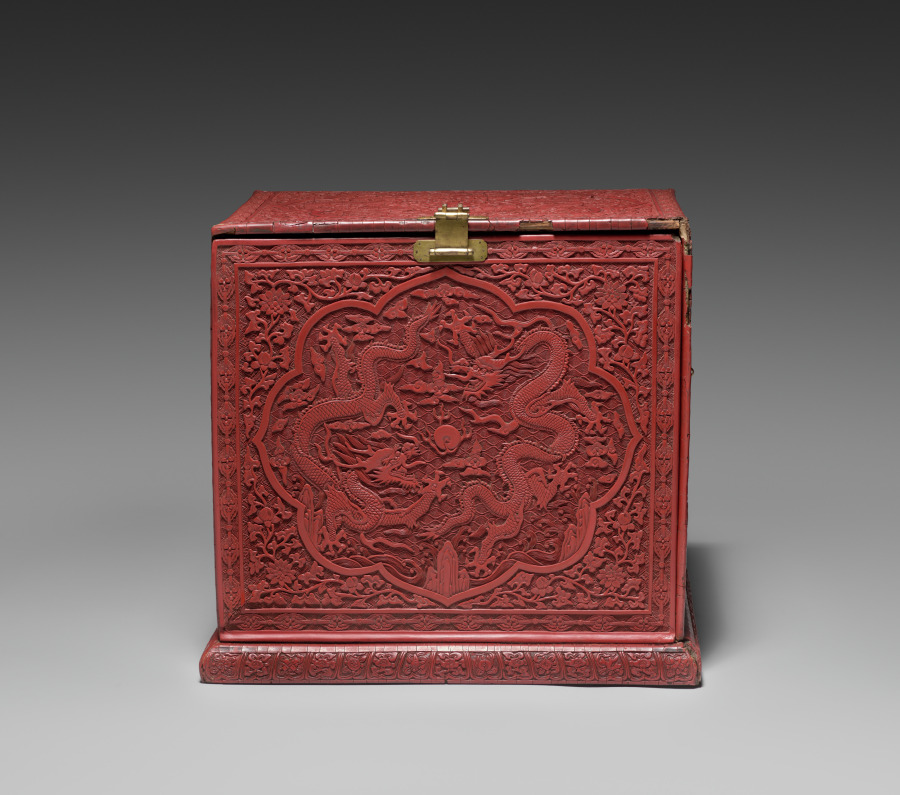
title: Tihong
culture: China, Ming dynasty (1368-1644), Wanli reign (1572-1620)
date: 1585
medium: carved cinnabar lacquer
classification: Lacquer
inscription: 大明萬曆乙酉年製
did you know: An inscription on the base of the chest dates it to 1585.